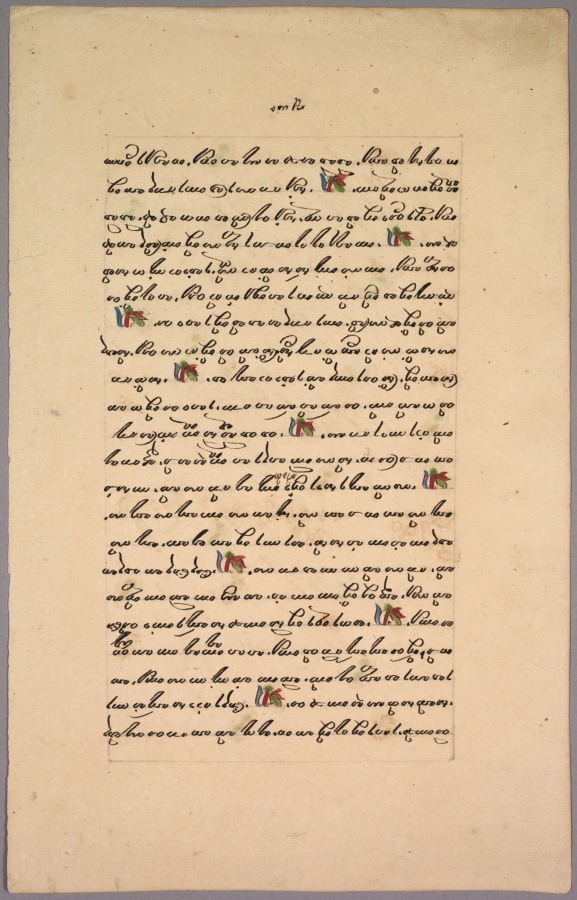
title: Page from Ramayana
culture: Java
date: 1800s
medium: ink on paper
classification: Manuscript